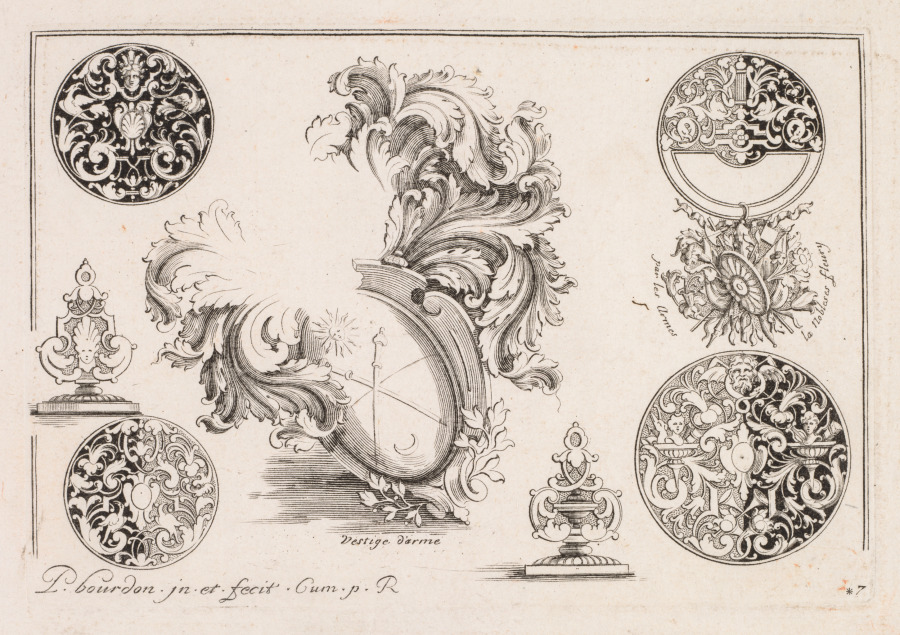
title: # 7from " Livre second essais de gravjre " Second book of Engraved Designs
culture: France, 18th century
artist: Pierre Bourdon (French)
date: c. 1703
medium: etching and engraving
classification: Print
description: This etching is from a set of prints showcasing decorative patterns by Bourdon. The title page for the set explains that the designs are “useful for clockmakers, goldsmiths, chiselers, engravers and other people.” These craftsmen who made ornamented objects sometimes consulted printed designs for inspiration. However, pattern prints similar to Bourdon’s also catered to aristocrats and wealthy professionals who pursued knowledge about artists and current styles.